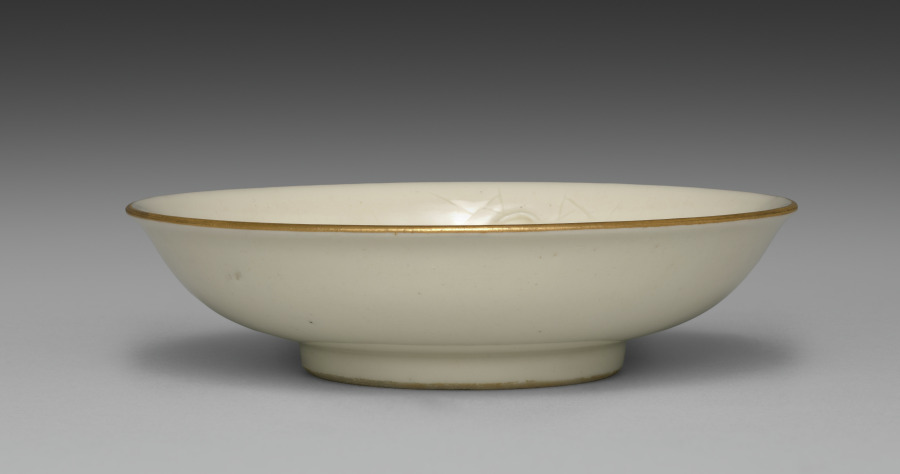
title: Small Dish from Dining Set with Plum Blossoms and Cracked-Ice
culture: Japan, Meiji period (1868–1912)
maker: Seifū Yohei II (Japanese, 1844–1878)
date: c. 1875–78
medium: Porcelain with molded designs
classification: Ceramic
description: Each item in this set has a delicate low-relief design of flowering plum branches over scattered, intersecting lines meant to resemble the cracked-ice surface of a frozen body of water and is signed on the base in gold pigment. While Yohei II produced many fine works in underglaze blue, like those produced by Kiyomizu Shichibei, he also made works in quite different styles later in his career, from the early 1870 s. In 1873, he was appointed purveyor to the Industrial Center of Kyoto Prefecture, a designation associated with Kyoto’s efforts to reach an international market through the port of Kobe; and from 1875 until his death, he was involved in national-level projects to present Japanese ceramics across the world. It was during this period that Yohei III was apprenticed to Yohei II, and it has been suggested that this set may in fact be an early example of Yohei III’s work, which he signed with his teacher’s name. Decorated with flowers resembling Japanese textile motifs, the set calls to mind the design of Yohei II’s pair of vases with plum blossoms in the Victoria and Albert Museum. Here, the elaborate trees created for a formal public exhibition setting have been translated into the approachable blossoms of the genteel domestic environment. While the designs are consistent across the pieces, each raised flower petal and pistil and each incised line in the ice was done by hand, so the cups, bowls, and dishes are similar yet unique. The bottoms of two boxes once identified the set’s owner, but the information has been deliberately obscured with black ink. However, inscriptions still visible appear to indicate two occasions, once at the end of July 1886 , and once again in June 1916 , when parts of the set were requested from Hokura in Niigata Prefecture. The location corresponds to a neighborhood in the present-day city of Jōetsu. The surname Tsuji 辻 also appears on a paper tag affixed to one of the box cloths. Future research may possibly reveal more about their provenance. A vase by Yohei III in a private collection combines the formal grandeur of the Yohei II vases in the Victoria and Albert Museum with the gentler design of this dining set, placing flowering plum trees against soft, scalloped-edge clouds resembling those in golden screens.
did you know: The dining wares have a creamy white coloration that the four boxes containing them identify as Korean in style.